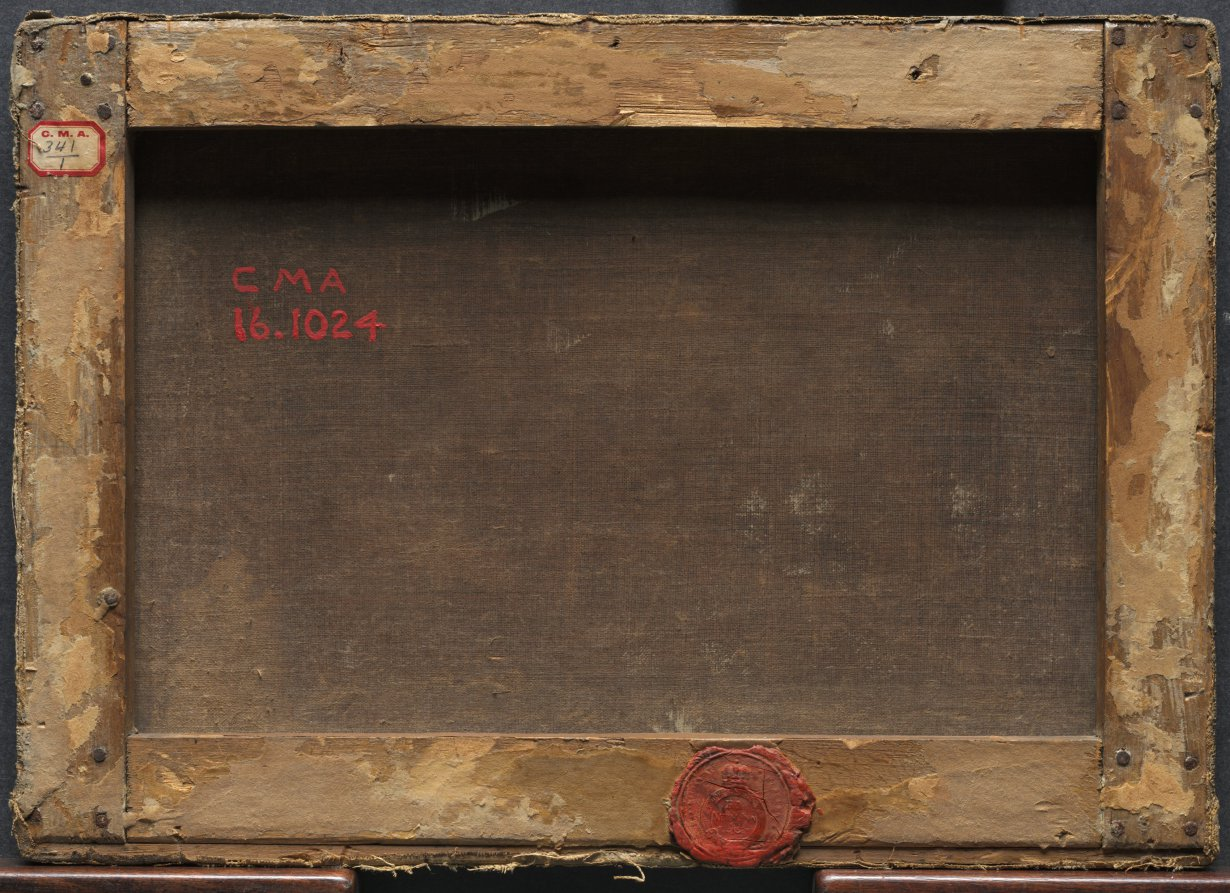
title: Diana and Her Nymphs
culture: Hungary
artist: Károly Markó (Hungarian, 1791–1860)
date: 1853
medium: oil on fabric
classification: Painting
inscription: Signed lower left: C. Markó p. Ap. 1853